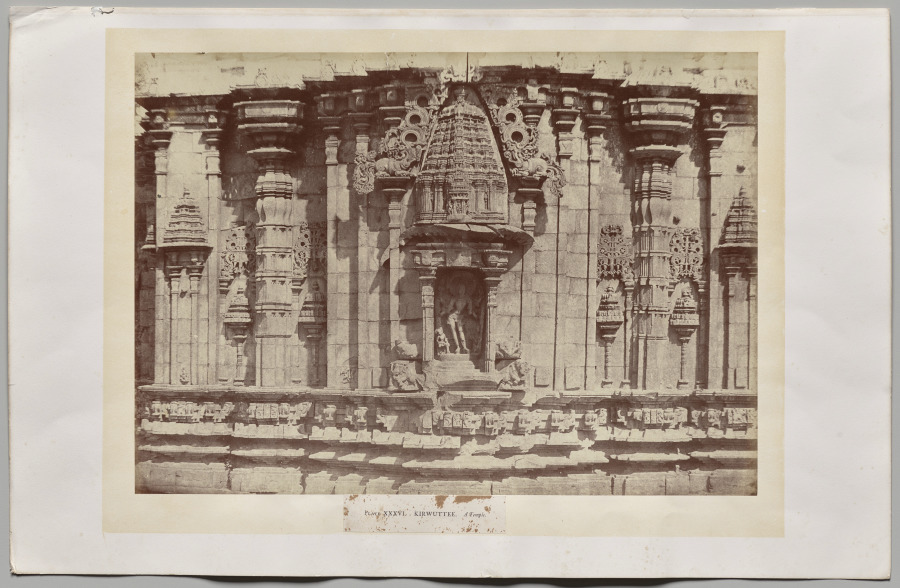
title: Kirwuttee, A Temple, India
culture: England, 19th century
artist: William Henry Pigou (British, 1818–1858)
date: c. 1857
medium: albumen print from paper negative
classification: Photograph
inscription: Imprinted in black type on white paper label mounted to recto: “Plate XXXVI. KIRWUTTEE. A Temple”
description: William Henry Pigou, a medical doctor who was an amateur photographer, spent 1856–57 working for the British colonial government recording ancient Indian monuments. This image of the temple at Kirwuttee (current accepted spelling is Kuruvatti) was taken around two years after the introduction of photography to India. This building primarily has miniature temple models as its exterior ornamentation in combination with only a few figural sculptures.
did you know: This building primarily has miniature temple models as its exterior ornamentation in combination with only a few figural sculptures.